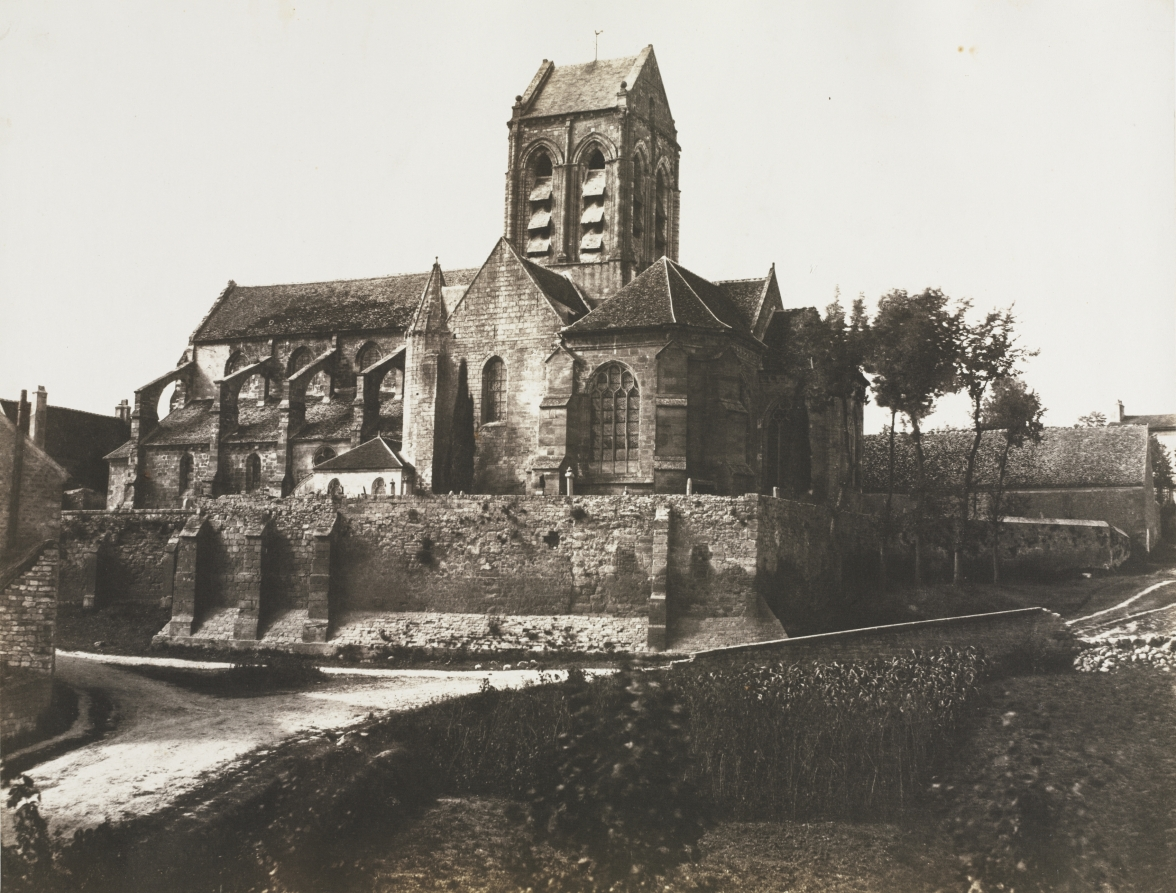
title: Church at Auvers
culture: France, 19th century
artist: Édouard Baldus (French, 1813–1889)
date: 1855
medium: salted paper print from waxed paper negative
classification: Photograph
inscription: Written in in black ink on recto: "Eglise d'Auvers"; in pencil: "X"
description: Baldus’s prodigious and compelling documentation of French historic buildings earned him recognition as one of the first great French architectural photographers. This image of Notre-Dame at Auvers-sur-Oise, north of Paris, is from a sequence of 50 views of the railroad stations and principal sites along the route between Boulogne-sur-Mer and Paris. This Gothic-style village church was once a chapel for a manor house that has since disappeared. Almost 35 years after Baldus’s composition, and only a short time before his own suicide, Vincent van Gogh painted a large, bold canvas of the church’s apse and bell tower.